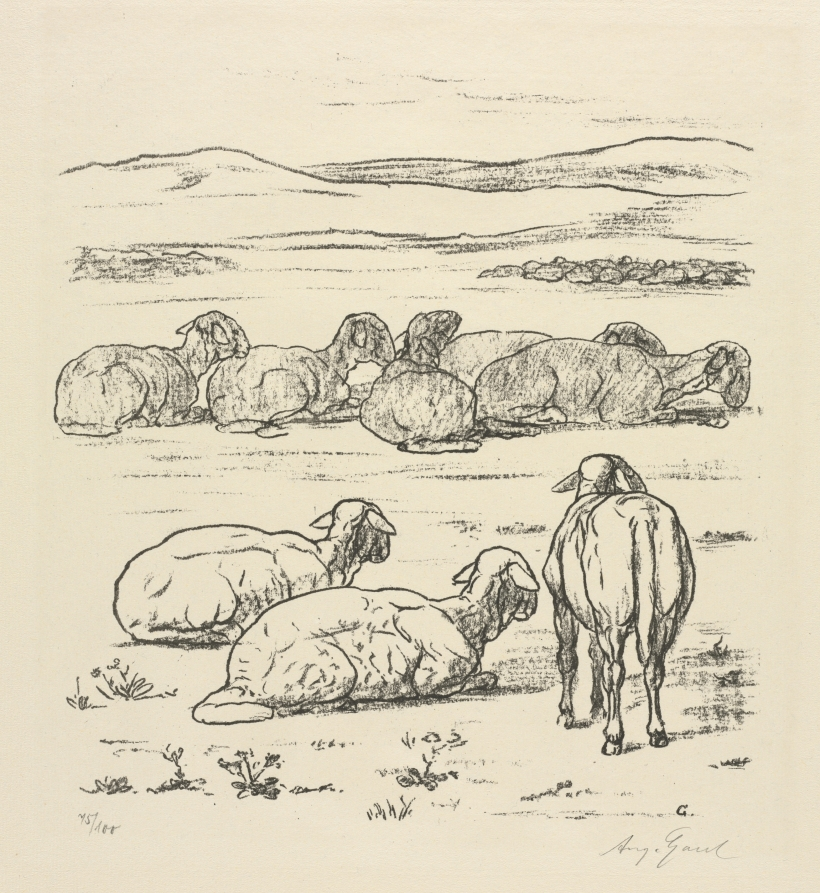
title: Sheep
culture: Germany, 20th century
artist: August Gaul (German, 1869–1921)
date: c. 1889–1921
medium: lithograph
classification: Print